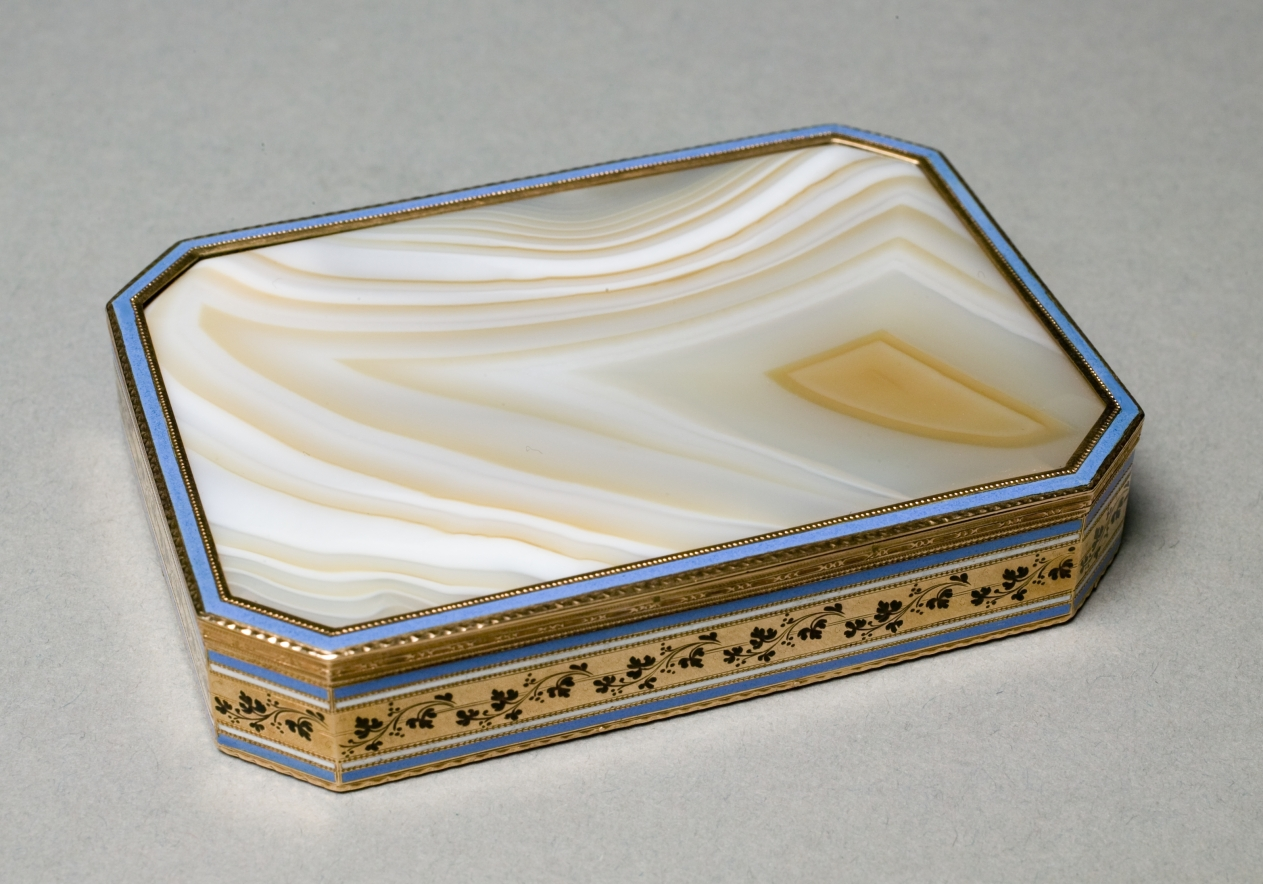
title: Snuff Box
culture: Switzerland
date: 1800–1815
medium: striated agate in gold and enamel mounts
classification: Miscellaneous